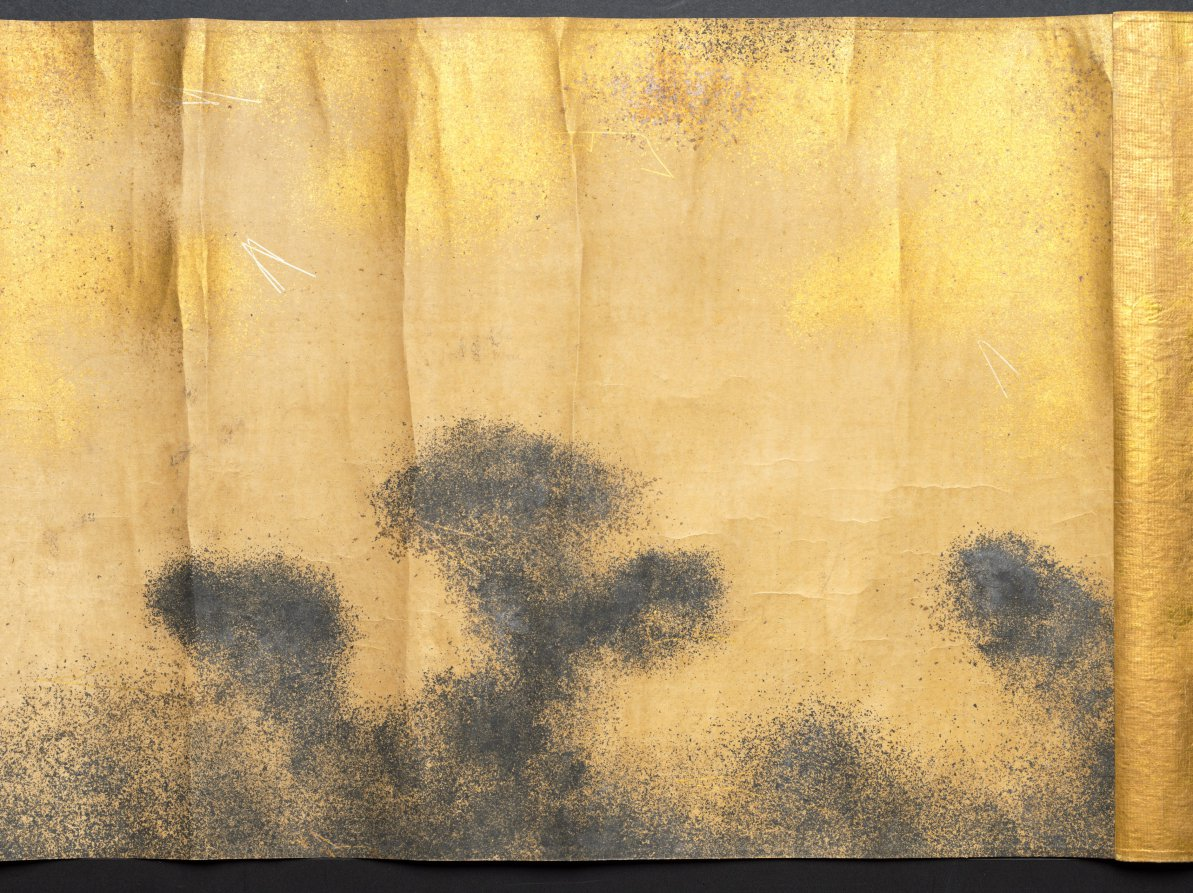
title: People Fleeing from a Fire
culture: Japan, Edo period (1615–1868)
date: 1615–1868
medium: Handscroll; color and gold on paper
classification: Painting